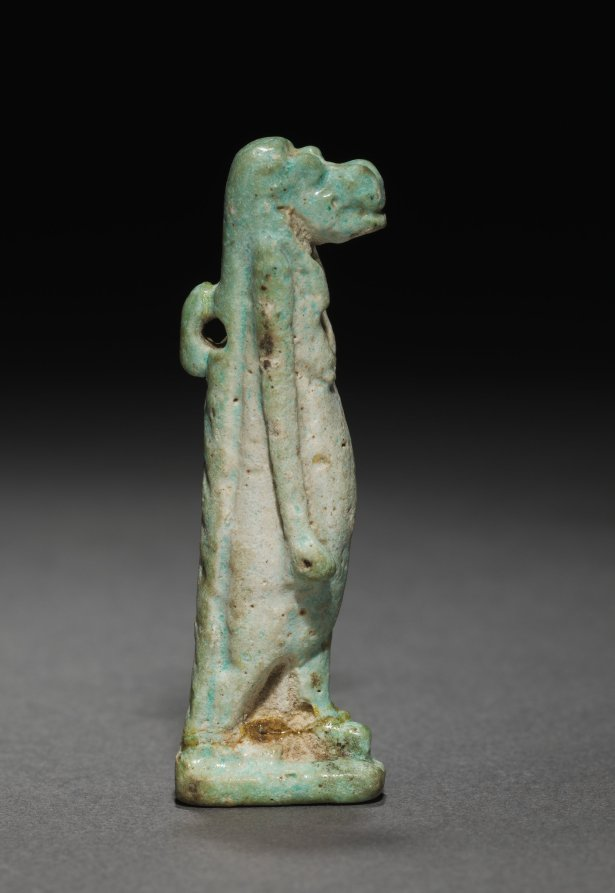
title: Amulet of Taweret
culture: Egypt, Greco-Roman period (332 BCE–395 CE), Ptolemaic dynasty (305–30 BCE)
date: 305–30 BCE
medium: light robin's egg blue faience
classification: Amulets